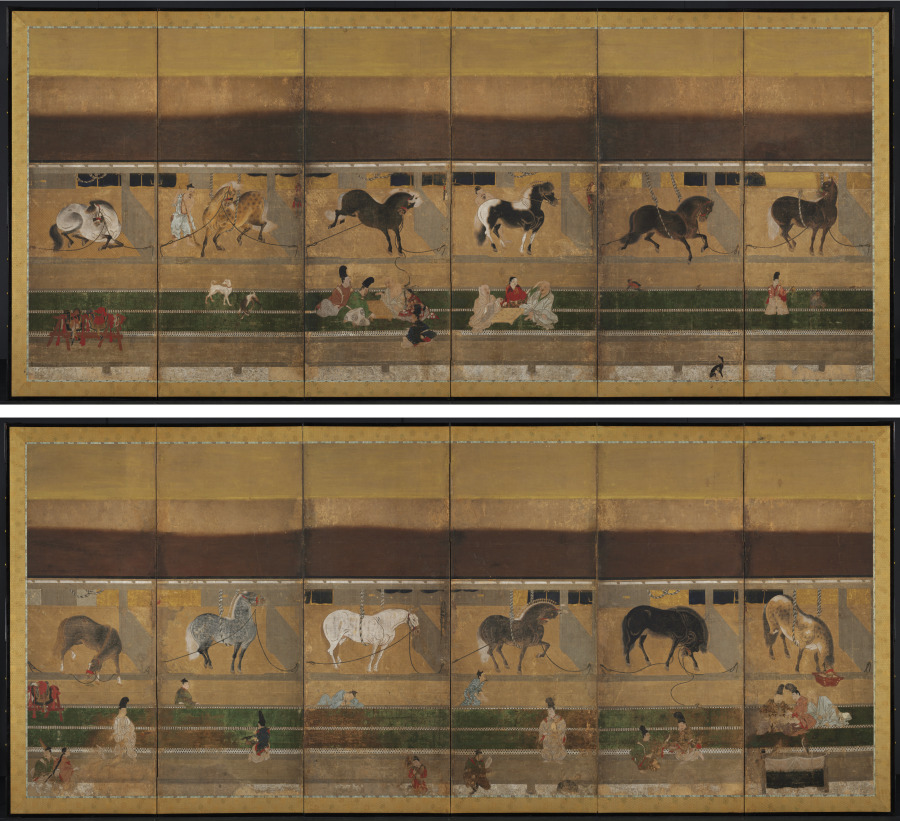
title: Horse Stable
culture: Japan, Muromachi period (1392–1573)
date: early 1500s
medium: Pair of six-panel folding screens; ink, color, and gold on paper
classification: Painting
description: Prized horses in stables may be the main theme of this pair of screens, but a lot of action is happening on the verandas. Falconry is the focus of one of the screens, while in the other, people challenge one another at two different boardgames, go and shōgi. A lively atmosphere develops in the interplay of the dynamic horses, the birds of prey, and the strategic games.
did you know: This is the earliest surviving example of the "horse stable" theme in Japanese screens.